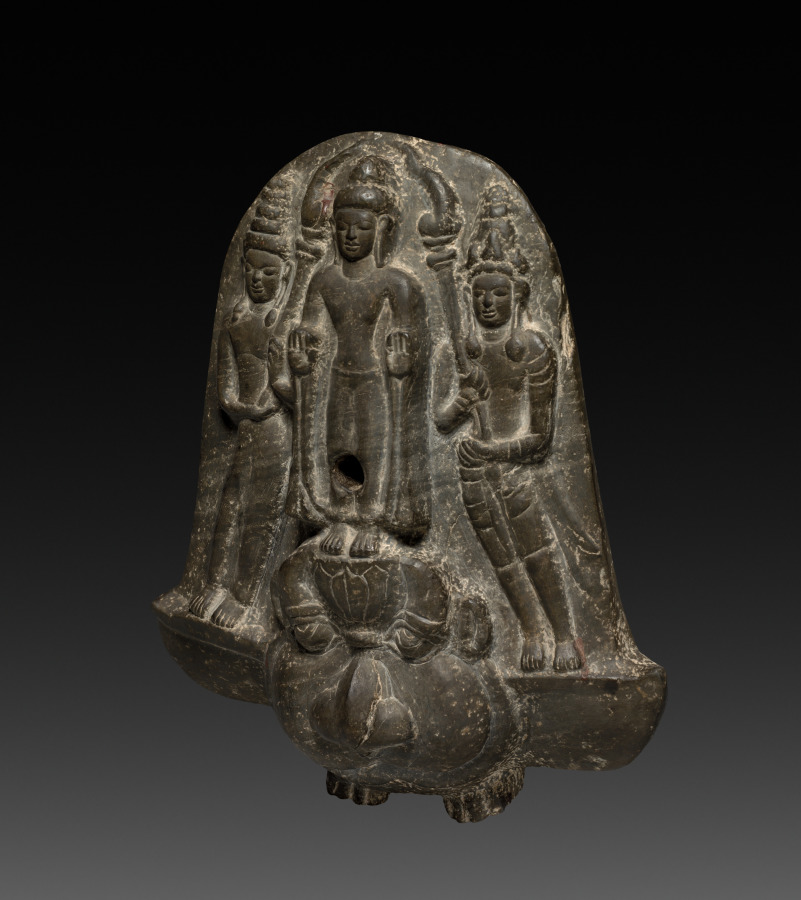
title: Bracket with Buddha and a Pair of Acolytes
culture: Thailand, Mon-Dvaravati style, probably from Nagara Pathama, 8th-9th Century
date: 700s–800s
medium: gray schist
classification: Sculpture